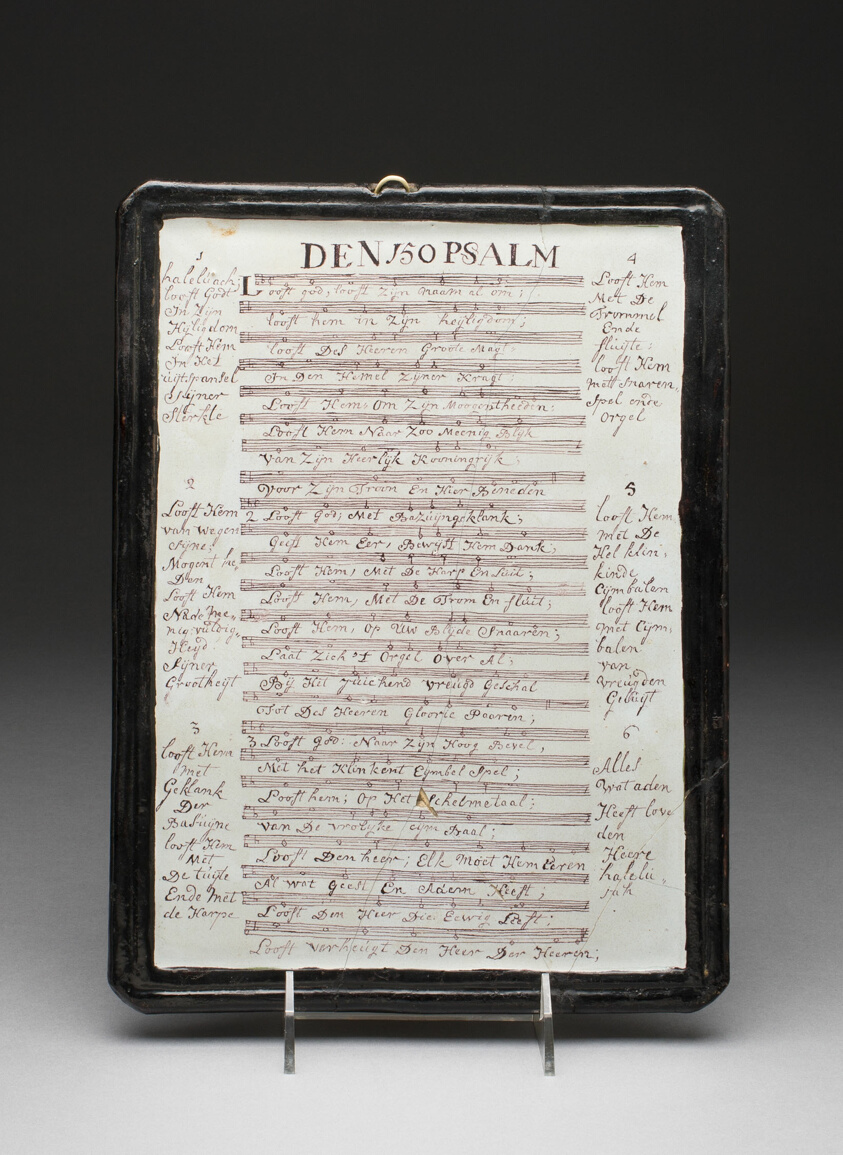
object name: Ceramics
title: Plaque: Psalm No. 150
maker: Probably Utrecht, Netherlands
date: early 19th century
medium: Tin-glazed earthenware (Delftware)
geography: Utrecht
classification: earthenware; ceramics; european decorative arts